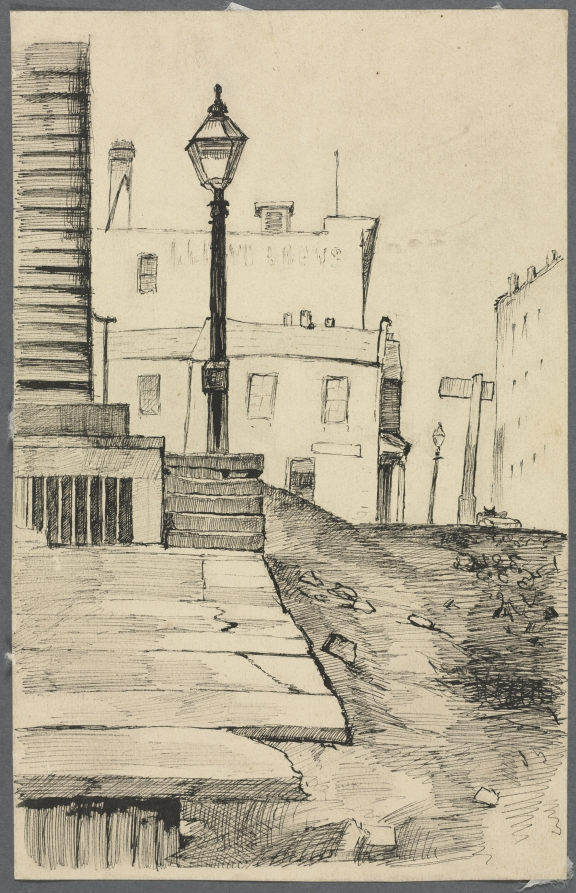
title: Street Scene, Cleveland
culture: America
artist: Otto H. Bacher (American, 1856–1909)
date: c. 1870–1909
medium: ink on paper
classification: Drawing